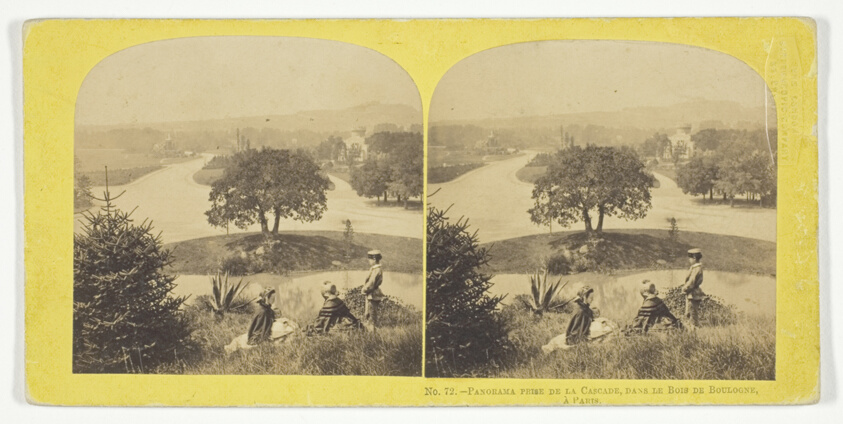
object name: Photograph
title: Panorama Prise de la Cascade, dans le Bois de Boulogne, A Paris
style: 19th century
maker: London Stereoscopic Company; English, 1854 - 1922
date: Late 19th century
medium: Albumen print, stereo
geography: London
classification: photography; photograph; albumen silver print; stereograph (albumen)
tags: Paris